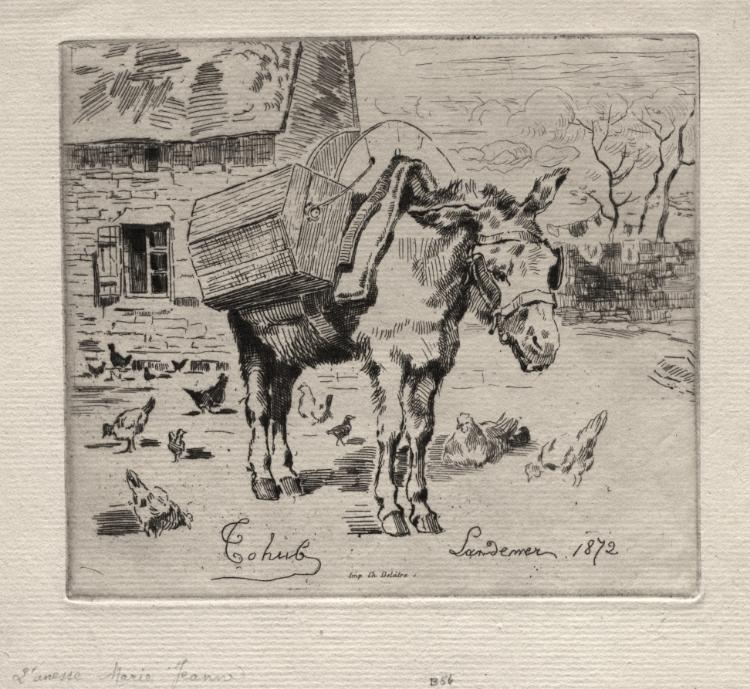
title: The Mule, Marie-Jeanne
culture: France, 19th century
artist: Félix Hilaire Buhot (French, 1847–1898)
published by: Ch. Delâtre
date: 1872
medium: etching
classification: Print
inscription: lower left, in plate: "Tohub"; lower right, in plate: "Landemer 1872"; lower center, printed: "Imp. Ch. Delâtre"